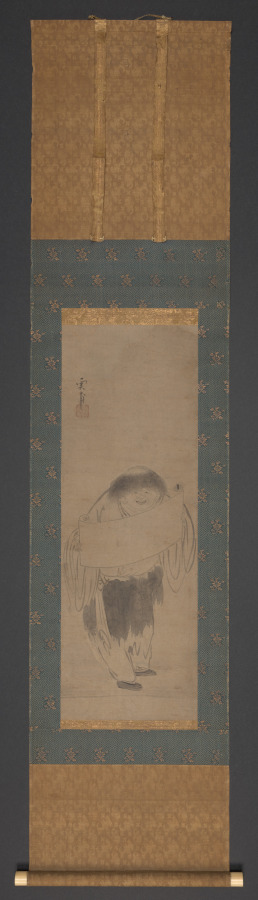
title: Kanzan Holding a Scroll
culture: Japan, Muromachi period (1392–1573)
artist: Unpo Shūkū (Japanese, active 1400s)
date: 1400s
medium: hanging scroll; ink on paper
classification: Painting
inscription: signed: "Unpo"